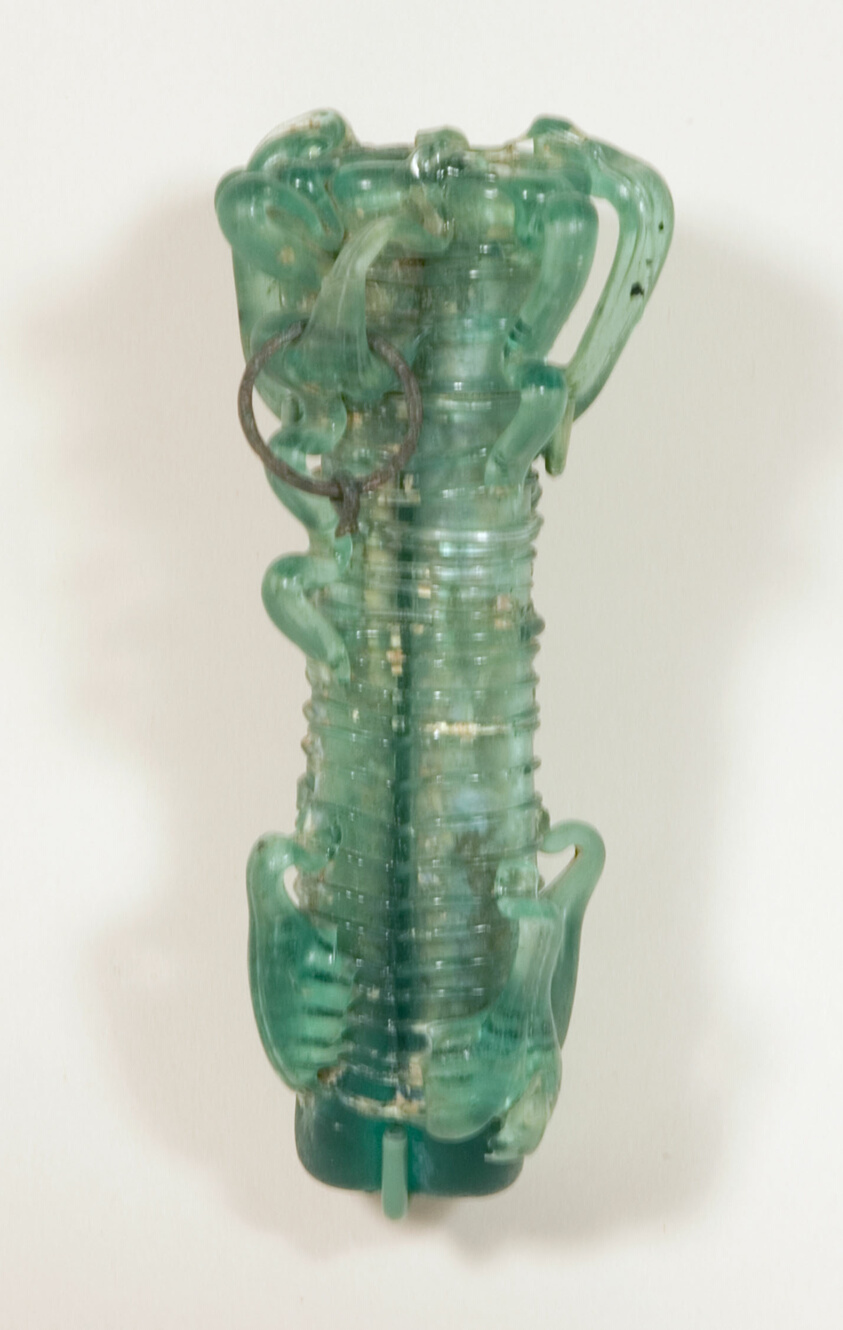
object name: Vessel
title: Kohl Container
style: palestinian, syrian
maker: Byzantine; Eastern Mediterranean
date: 5th-6th century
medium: Glass, blown technique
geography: Levant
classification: personal grooming / hygiene / cosmetic container; glass; vessel; ancient art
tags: vessels, beauty